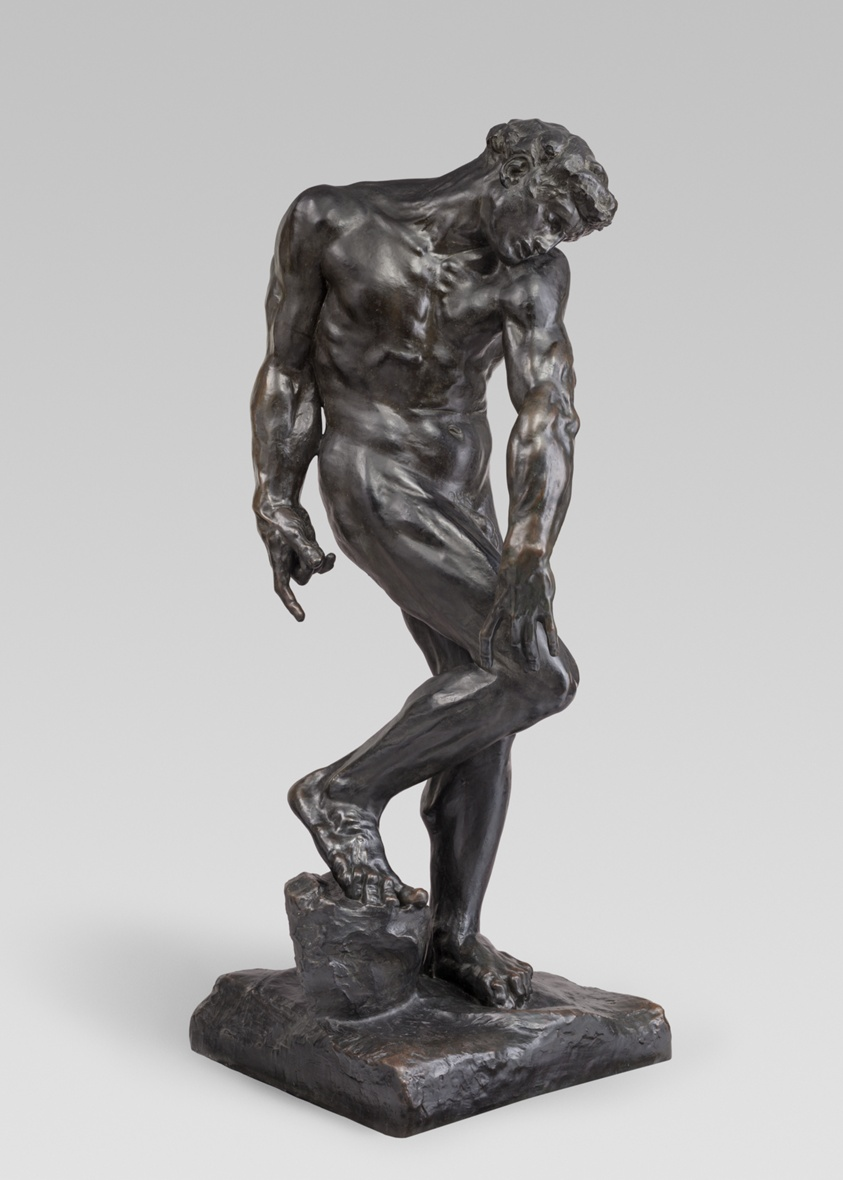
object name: Sculpture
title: Adam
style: Post-Impressionism, 19th century, 20th Century, nineteenth century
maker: Auguste Rodin (French, 1840–1917)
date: Modeled 1881, cast c. 1924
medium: Bronze with dark brown patina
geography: France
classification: large scale; sculpture; bronze; french; figure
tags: religion, religious scenes, emotions, portraits, men, genesis, man, nudes, religious figures